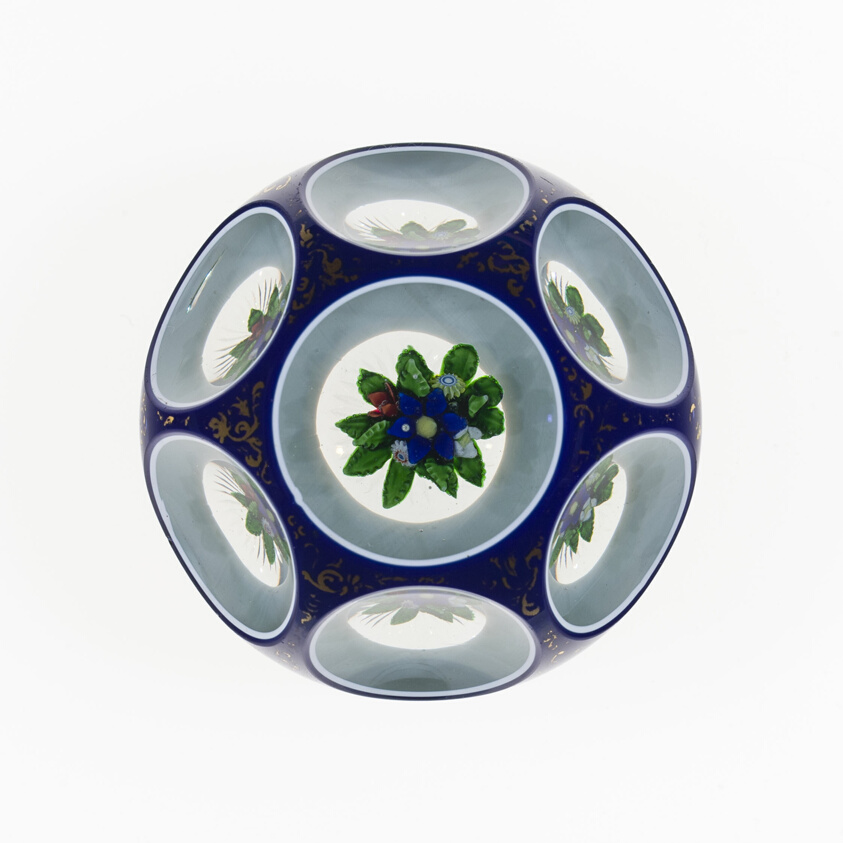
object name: Glass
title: Paperweight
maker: Saint-Louis Glassworks (Cristalleries de Saint-Louis); Lorraine, France, founded 1586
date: c. 1845–60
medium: Glass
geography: Saint-Louis-lès-Bitche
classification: paperweight; glass